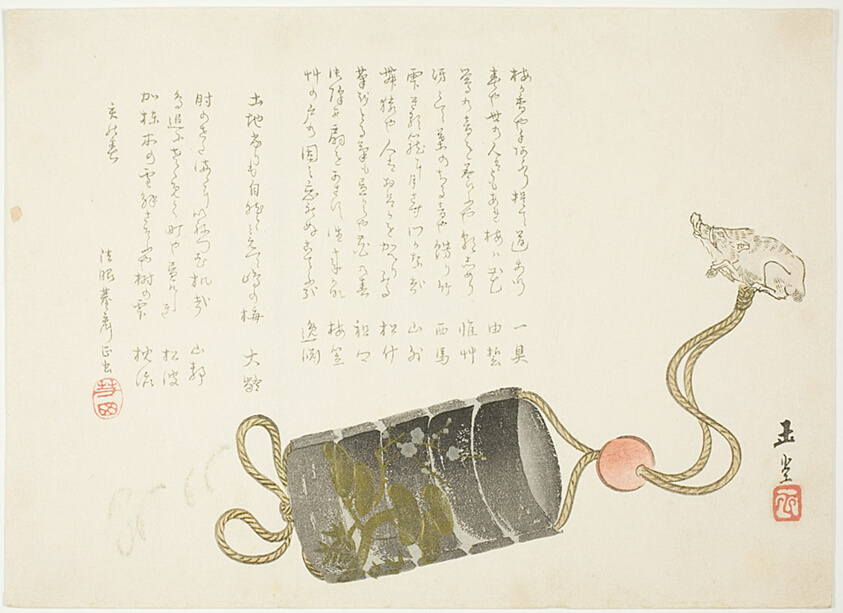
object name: Print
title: Inro and Netsuke in the shape of a Boar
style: edo (japanese period), Japanism, East Asian, asian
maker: Kurinara Gyokudo (Japanese, active 1830-1850)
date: Early 19th century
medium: Color woodblock print; surimono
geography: Japan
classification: woodblock print; print; asian art